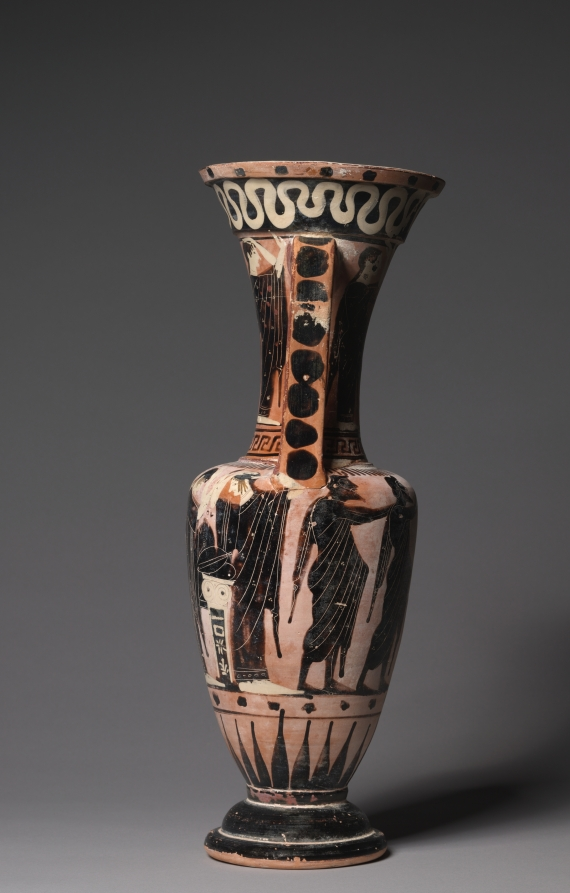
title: Black-Figure Loutrophoros-Amphora (Ritual Water Vessel): Prothesis (Laying out of Corpse), Mourners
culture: Greek, Attic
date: c. 500 BCE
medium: ceramic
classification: Ceramic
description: The loutrophoros, a tall-necked water vessel, served two main purposes in ancient Athens. In life, it carried sacred spring water for ceremonial pre-marriage baths. After death, it marked the tomb of an unmarried person, as if to account for that not experienced in life. Often, as here, it has no bottom, permitting offerings to flow through to the grave. Both the precise shape of this vase—a two-handled loutrophoros-amphora rather than a three-handled loutrophoros-hydria—and its depiction of the deceased suggest the commemoration of a departed man (rather than a woman). The iconography is entirely funerary, with multiple mourning figures shown: four women on the neck; six women surrounding the corpse on its bier; and three men making farewell gestures. The inscriptions near some of the mourning women do not spell out real words but may represent their sorrowful cries.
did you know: Mourning figures wrap all the way around this vessel, even beneath the handles.